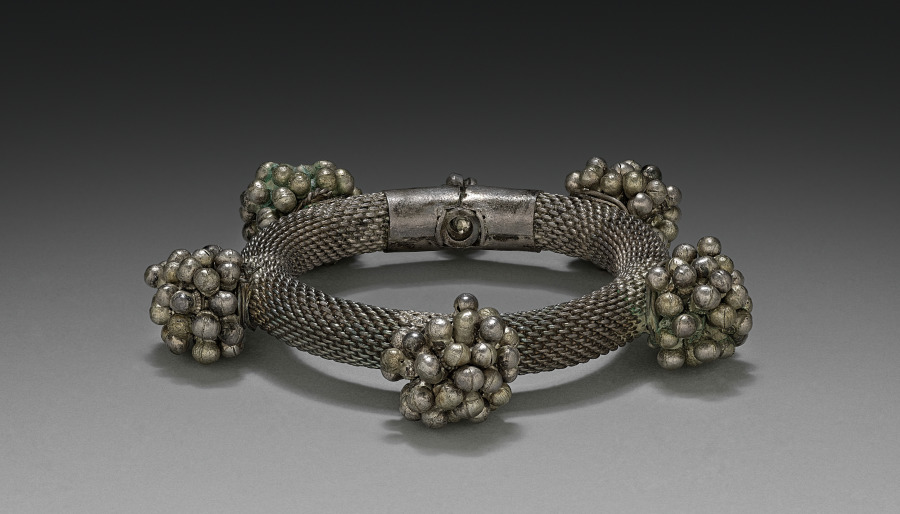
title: Bracelet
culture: India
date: early 1900s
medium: silver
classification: Jewelry